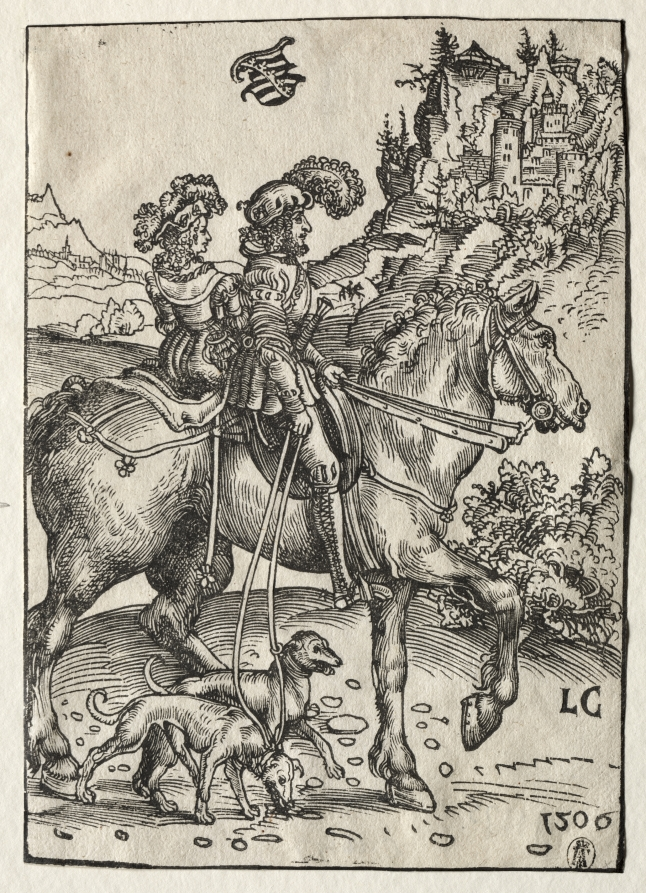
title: A Gentleman and a Lady Riding to the Chase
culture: Germany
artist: Lucas Cranach (German, 1472–1553)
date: 1506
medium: woodcut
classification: Print